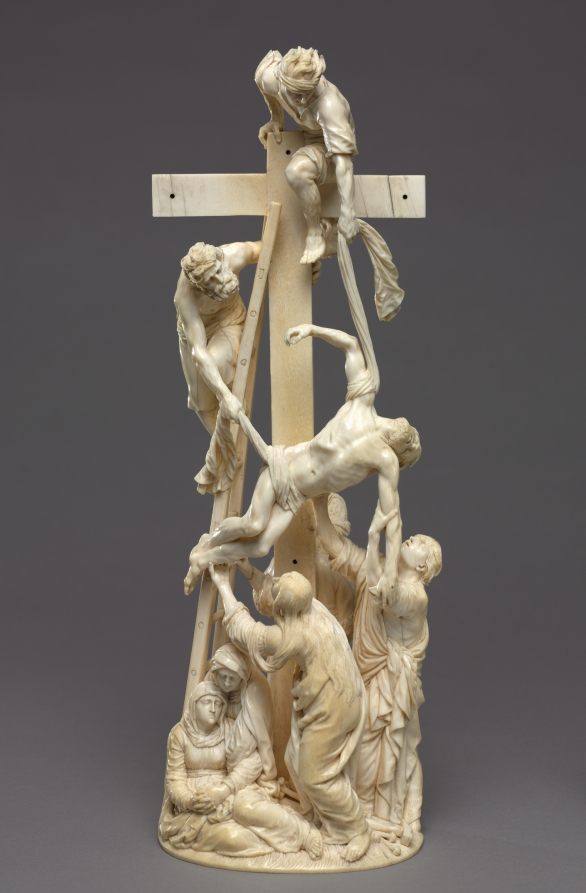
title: Descent from the Cross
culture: Austria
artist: Adam Lenckhardt (German, 1610–1661)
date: 1653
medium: ivory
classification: Sculpture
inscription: inscribed with monogram "AL" conjoined and dated 1653.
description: Carved from a single piece of ivory for Prince Karl Eusebius von Liechtenstein of Vienna, this work is a true tour-de-force. It took Lenckhardt seven years to complete; it is his last known sculpture and the pinnacle of his career. The biblical accounts of the descent from the cross found in the gospels are not consistent, which may contribute to the difficulty in precisely identifying the figures. The Virgin Mary, Saint John, Mary Magdalene, and others were said to be present, but undoubtedly there are other disciples here mourning Christ’s death. The intense emotion registers on the faces of the figures in the scrupulous and exquisitely detailed work.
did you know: Carved from a single elephant tusk, the artist took special care to ensure the ivory did not crack or break as he meticulously crafted each figure in this visually exciting sculpture. Look closely to find tools and small objects included near its base.